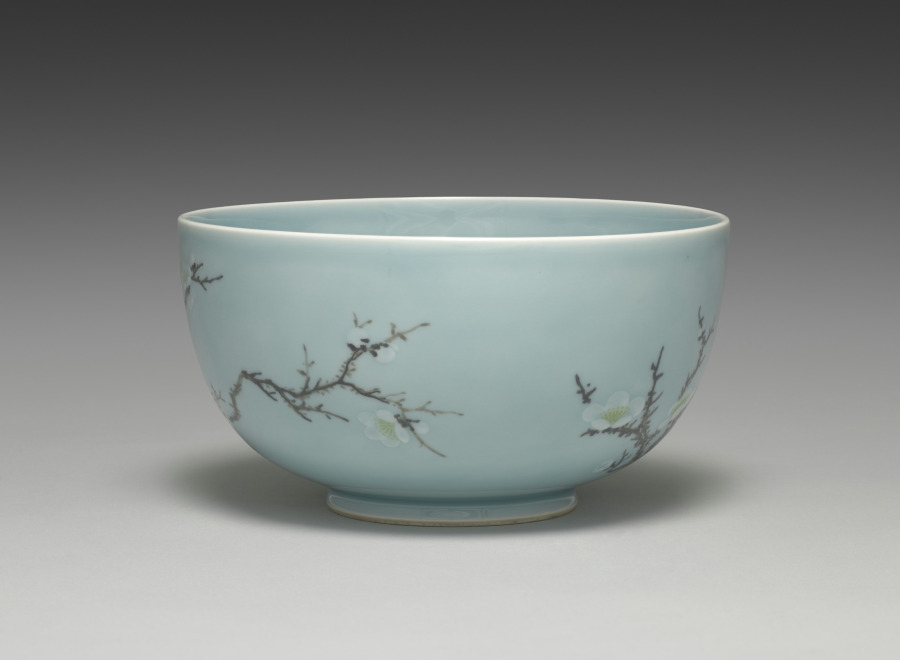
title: Sweets Bowl with Plum Tree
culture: Japan, Taishō period (1912–26) to Shōwa period (1926–89)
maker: Seifū Yohei IV (Japanese, 1872–1951)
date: 1914–46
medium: Porcelain with underglaze color and modeled design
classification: Ceramic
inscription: 清風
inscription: 清風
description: In Chinese culture, the plum symbolizes the virtue of perseverance. For his sweets bowl based on Qing dynasty (1644–1911) Chinese prototypes, Seifū Yohei IV first painted the gnarled boughs of a plum tree in iron oxide on the surface. Then he made the tree’s blossoms slightly raised by building up slip, or liquified clay. He painted their centers yellow. Before applying the blue glaze, he covered the blossoms with paper so that they remained white.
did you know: Broad access to high-quality Chinese ceramics occasioned by the collapse of the Qing dynasty (1644–1911) and the dispersal of elite Chinese collections presented Seifū Yohei IV with models for both molded decoration and painted motifs.